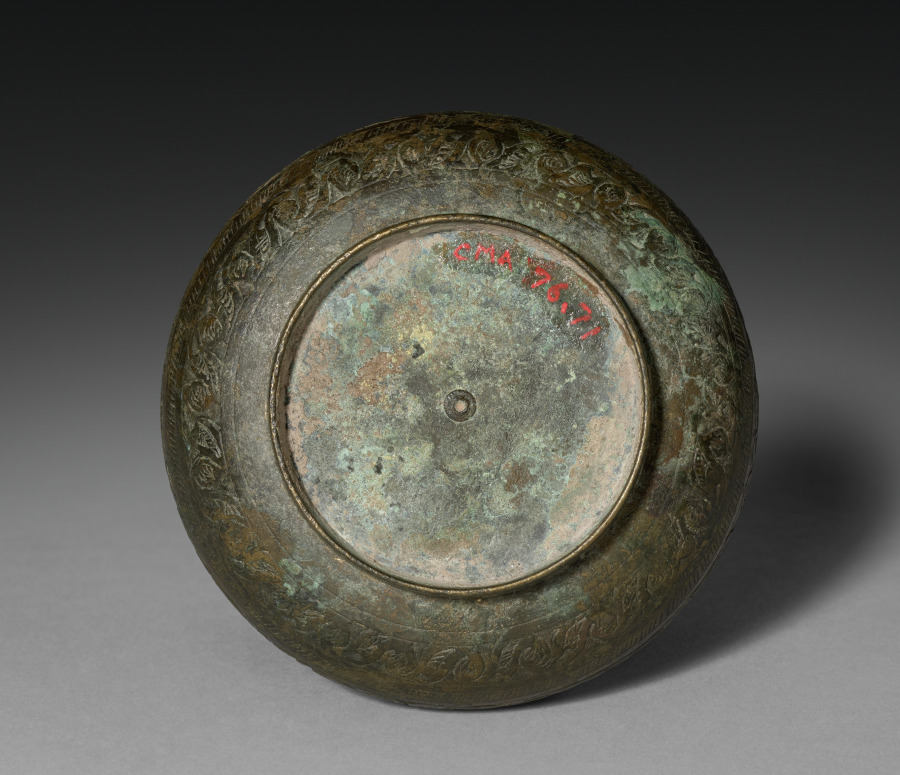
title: Reliquary Box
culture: Pakistan, Gandhara, probably Swat, late Kushan period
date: 200–400 CE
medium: bronze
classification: Metalwork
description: This casket in bronze represents the great variety of reliquary caskets. It is round, has a low foot, and is covered with a lid (with raised handle) that fits over the vessel rather than being inset. It is a traditional shape frequently encountered in Gandharan reliquaries, but its slight flattening and elaborate decoration imply a slightly late date. A central band of a floral creeper decorates the main body of the box and its lid, and is framed on both sides by narrower fluted bands. This type of freehand design is characteristic of the late Kusana-early Gupta period. Similar floral patterns are found in another CMA object (1972.164), the lid of a box showing combat between a man and a lion, which also dates to a later period. There the design fills the vacant areas in the busy composition. This pattern, however, has its antecedents in the Begram ivories . which, according to most sources, pre-date the Sasanian invasion of the mid-third century AD. Therefore, it can be assumed that this type of floral decoration was already in use in the third century and that this reliquary box probably dates to the third-fourth century AD. The bronze alloy, in its somewhat silverish-metallic appearance, seems to be very close to the material used in the Swat bronzes, which suggests that Swat may also be the provenance for this reliquary.